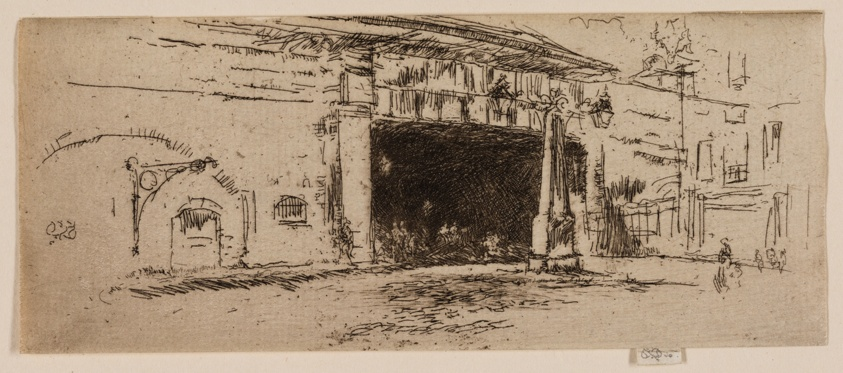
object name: Print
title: Railway Arch, American Square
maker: James McNeill Whistler (American, 1834-1903)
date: 1887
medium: Etching with foul biting in black ink on off-white laid paper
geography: United States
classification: etching; foul biting; print; prints and drawing; paper